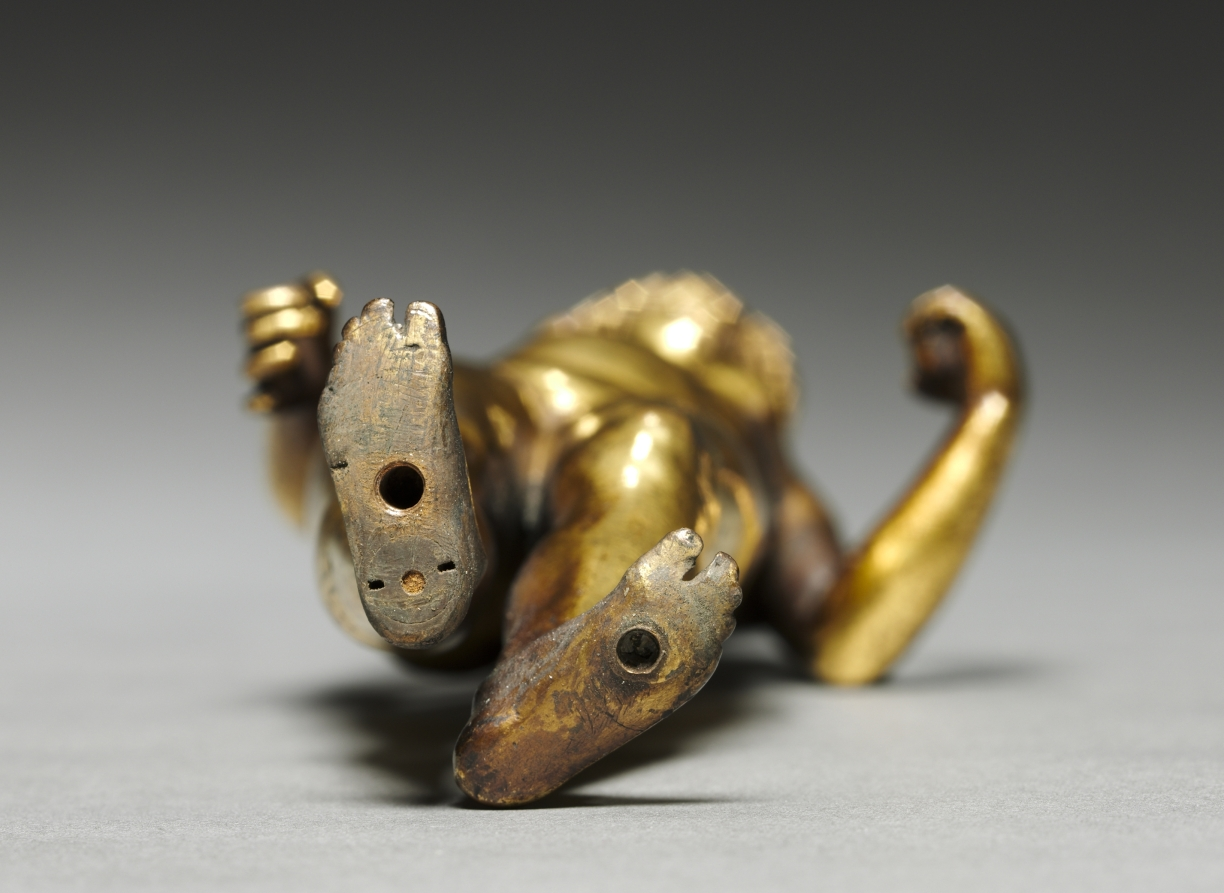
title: Venus with a Burning Urn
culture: Northern Italy, 16th century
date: c. 1500–1520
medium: gilt bronze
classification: Sculpture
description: Venus is the Roman goddess of many virtues, including Love, Charity, Fertility, and Victory. Here, Venus is represented as the goddess of Charity. She wears a crown, as Charity is often depicted as the Queen of the Virtues. The flaming lamp in Venus's left hand was also a symbol of Charity in Venice, where this piece is thought to have originated. The bent fingers of her right hand are bent suggest that Venus may have once held another object. Renaissance sculptors often looked back to antiquity when producing monumental and small bronze statues. The small bronze cabinet piece comes into Italian art during this time, bringing ancient gods and goddesses into Italian households. Venus stands in a contrapposto pose and, like Hellenistic and Roman objects, her locks are tied by a double ribbon while two curls fall on her shoulders. Her tilted head and large emotional eyes, as well as her small nose and parted lips reflect the influence of Hellenistic Greek facial styles.